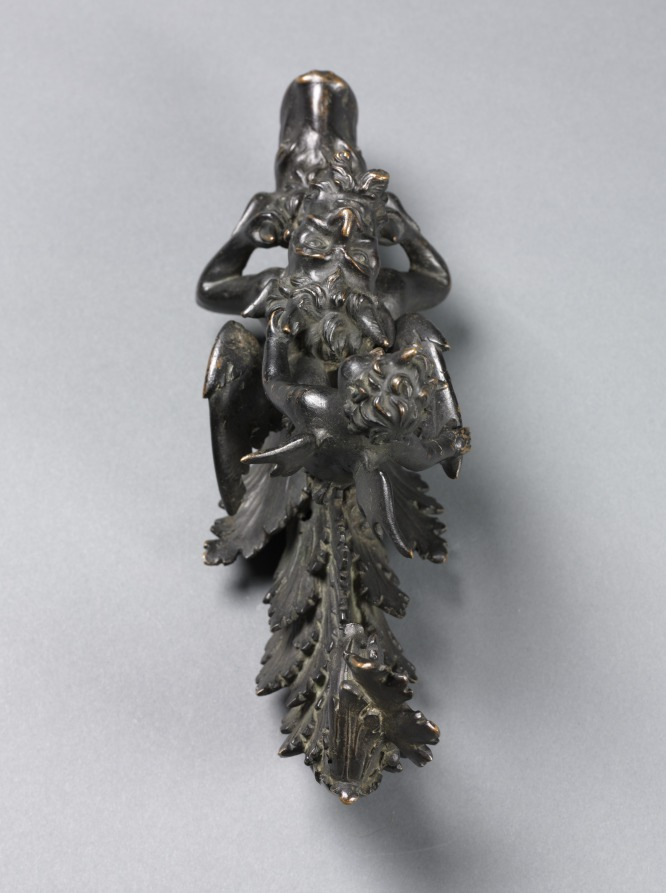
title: Doorknocker with Two Satyrs Riding an Ox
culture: probably Italy, Style of Padua, 16th Century, 19th century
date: 1800s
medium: bronze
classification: Sculpture